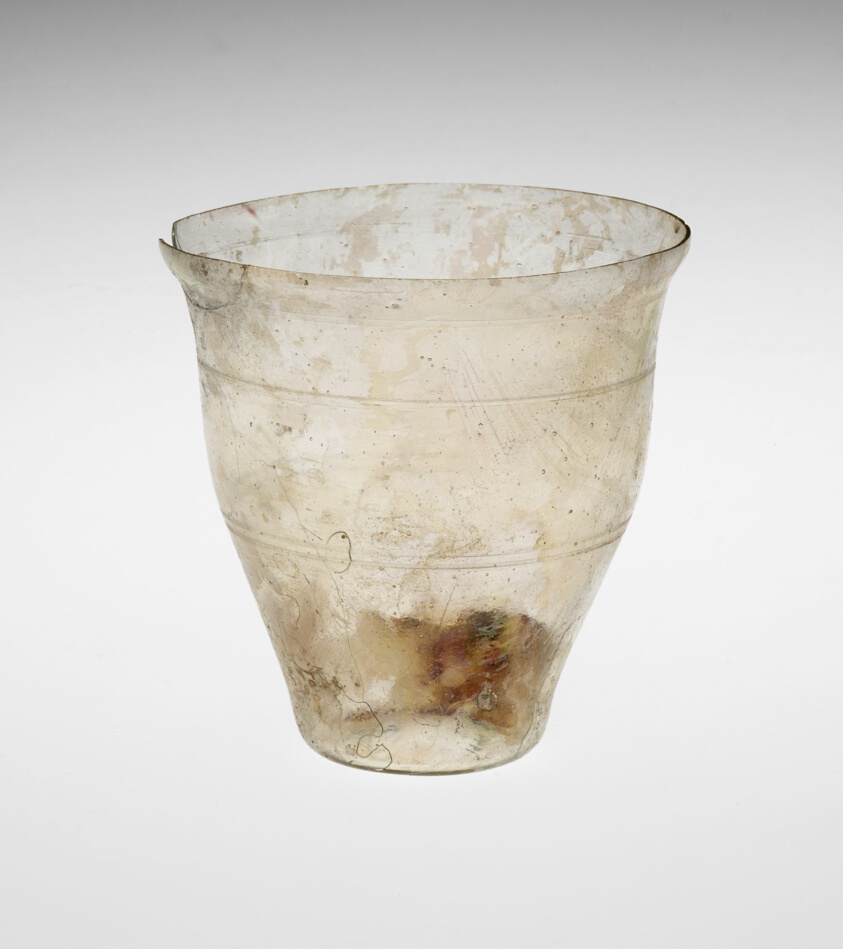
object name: Vessel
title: Beaker or Cup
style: roman (ancient, style or period), ancient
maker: Roman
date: Probably 1st-early 2nd century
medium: Glass, blown technique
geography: Roman Empire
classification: drinking vessel; glass; vessel; ancient art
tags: containers